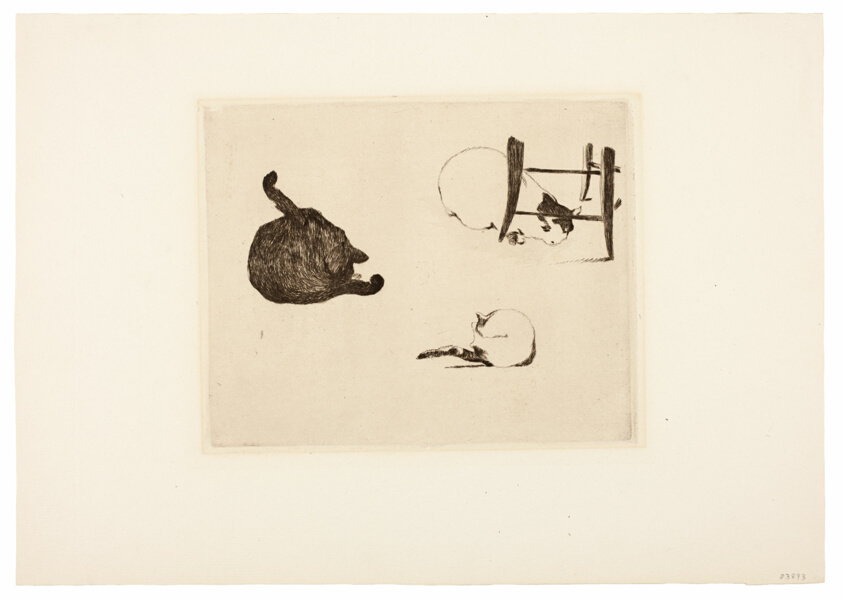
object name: Print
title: The Cats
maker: Édouard Manet (French, 1832-1883); published by Alfred Strölin (Swiss, 19th-20th centuries)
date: 1868–69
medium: Etching and aquatint with plate tone in warm black on cream laid paper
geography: France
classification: etching; print; prints and drawing